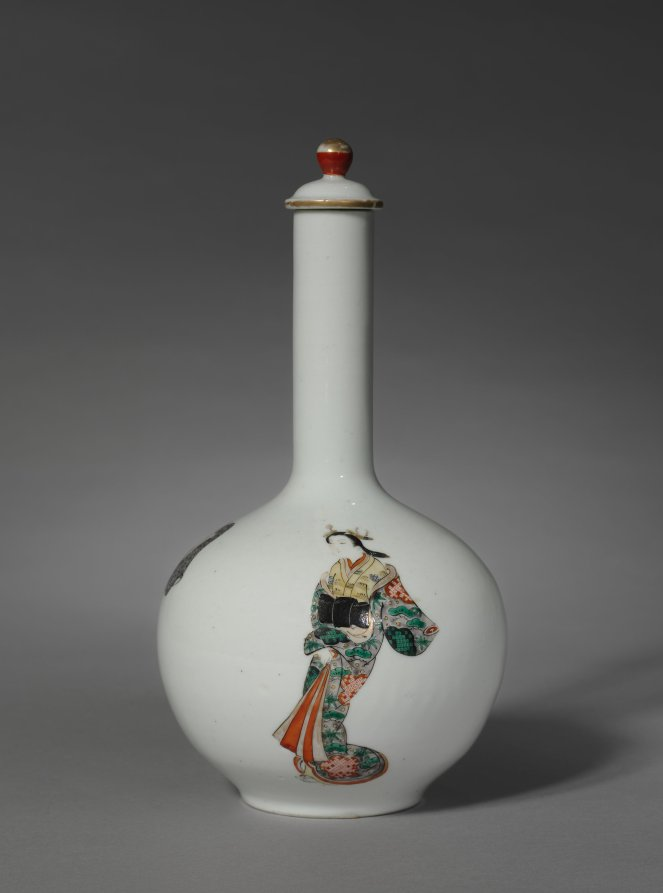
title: Sake Bottle with Three Figures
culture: Japan, Edo period (1615–1868)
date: late 1700s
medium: porcelain with overglaze enamel and gold decoration (Hizen ware, Arita type)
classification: Ceramic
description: The bottle features three elegantly drawn figures: a beautiful woman, a young man, and a priest. The artist used a fine-haired brush to draw these figures in colored enamel onto the porcelain bottle, which had already been given a clear glaze. A final firing fused the enamel to the form. The name derives from the port of Imari from where Japanese porcelains were shipped to other cities in Japan, China, and Europe.